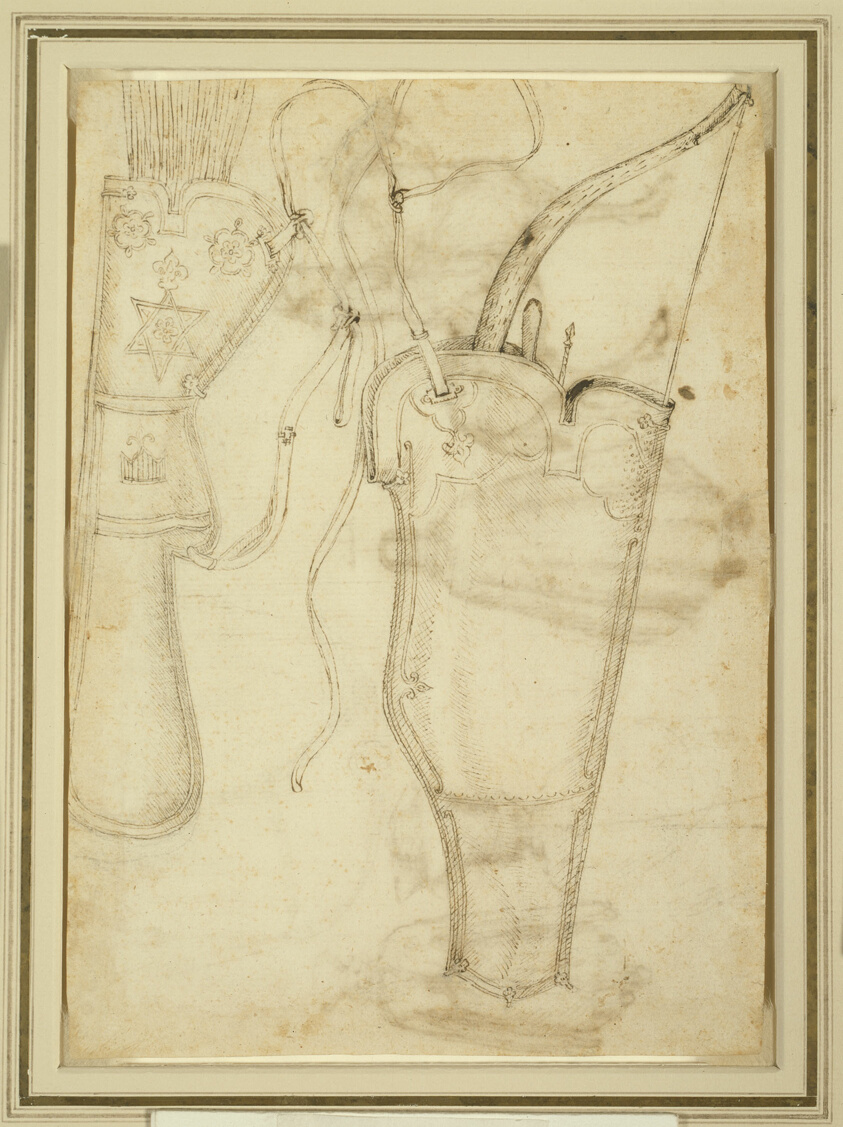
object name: Drawing and Watercolor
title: Bowcase and Quiver of Arrows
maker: Pisanello (Italian, by 1395-c. 1455)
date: 1438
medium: Pen and brown ink on ivory laid paper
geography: Italy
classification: pen and ink drawings; drawings (visual works); prints and drawing